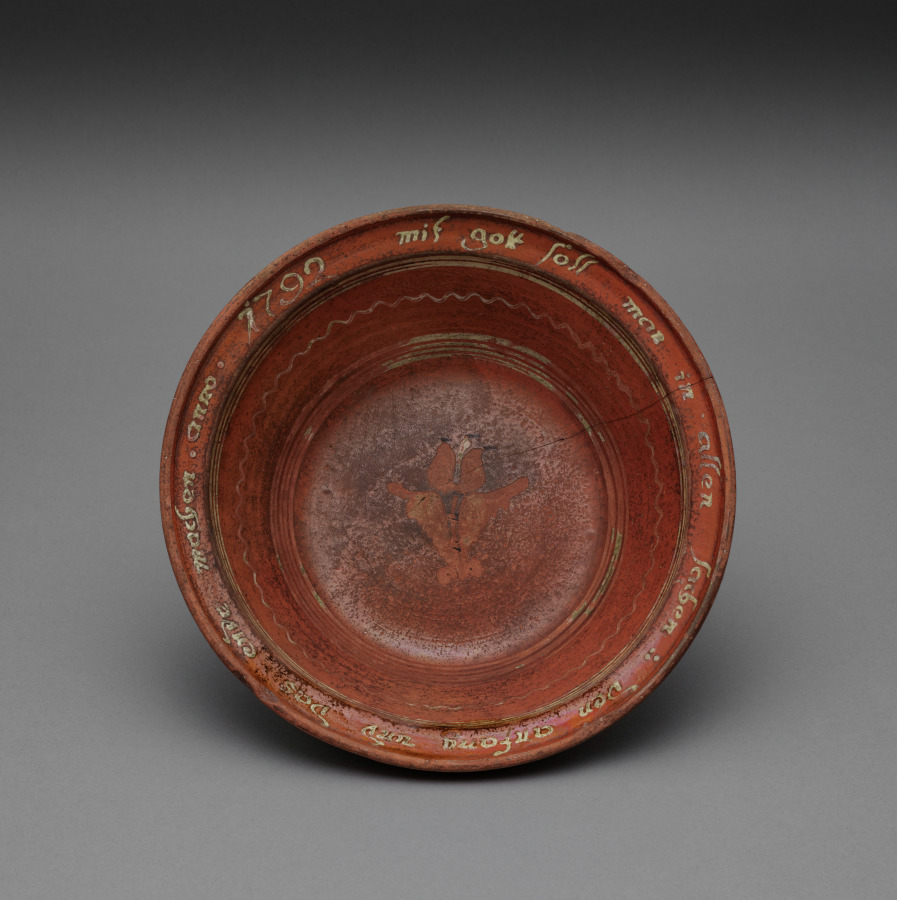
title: Dish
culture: Germany, Bingen on the Rhine, 18th century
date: 1792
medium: earthenware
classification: Ceramic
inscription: "Mit Gott Soll Man in allen Sachen Den Anfang und das Ende machen. 1792" (With God all your affairs attend from the beginning to the end. 1792).